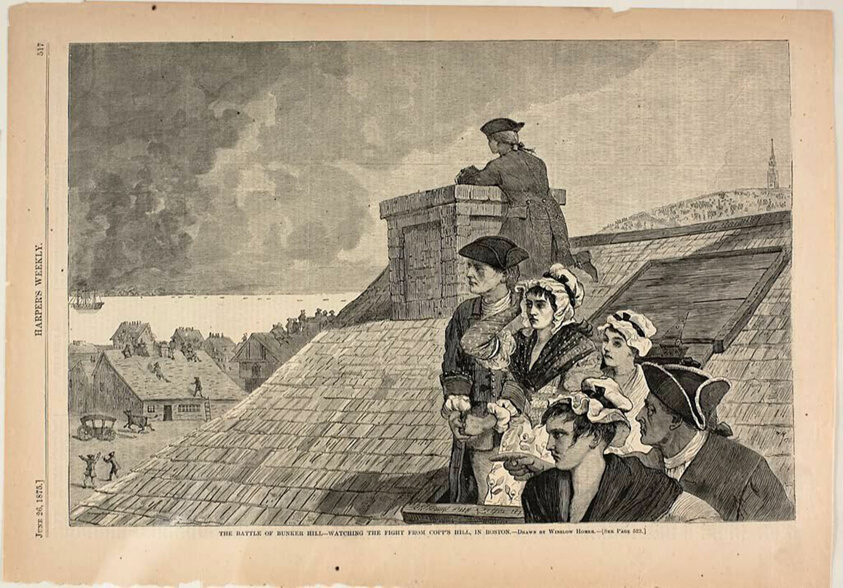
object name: Print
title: The Battle of Bunker Hill—Watching the Fight from Copp's Hill, in Boston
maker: Winslow Homer (American, 1836-1910); published by Harper's Weekly (American, 1857-1916)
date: published June 26, 1875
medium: Wood engraving on paper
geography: United States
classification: wood engraving; print; prints and drawing